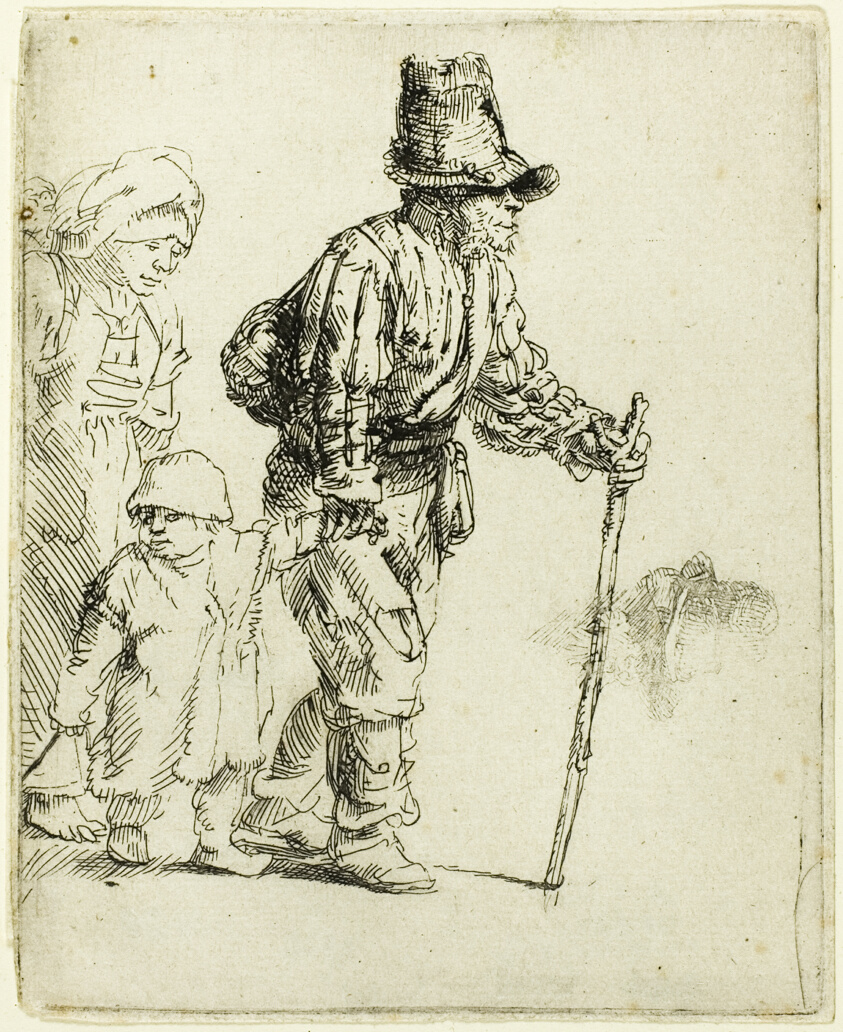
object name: Print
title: Peasant Family on the Tramp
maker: Rembrandt van Rijn (Dutch, 1606-1669)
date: c. 1652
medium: Etching on ivory laid paper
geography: Holland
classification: etching; print; prints and drawing; paper